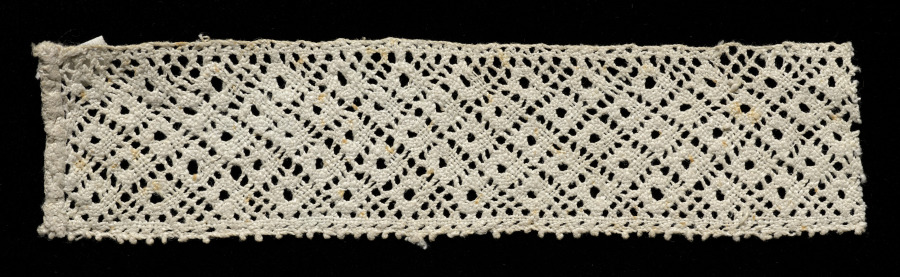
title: Lace Insertion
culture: Italy, Umbria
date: 1600s–1700s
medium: Bobbin lace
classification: Lace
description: The design motif of this piece of lace is referred to as "piedi di gallina" (chicken's feet).